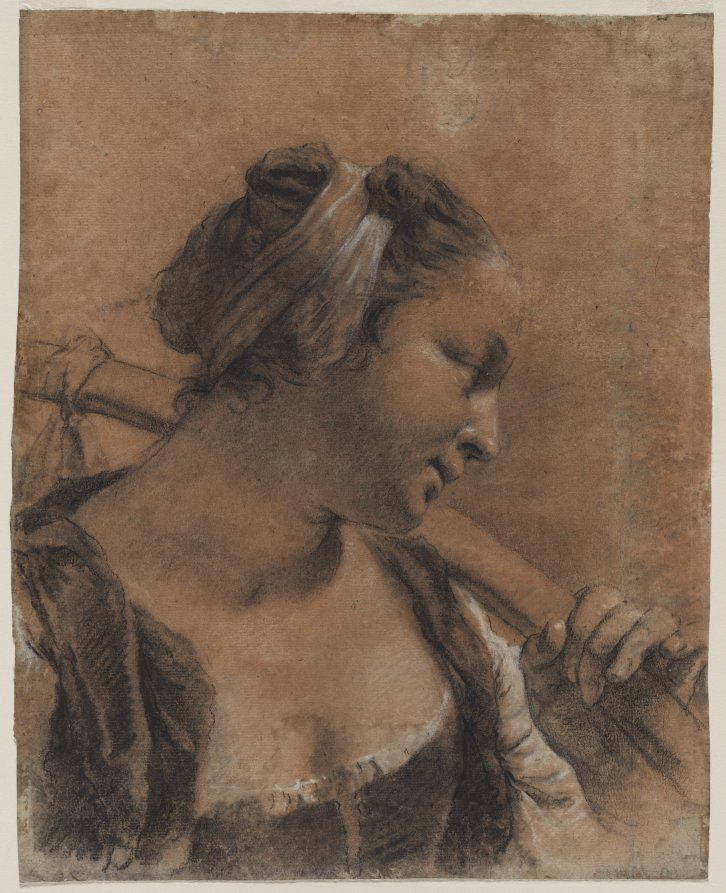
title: A Portrait of Rosa with a Shoulder Stick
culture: Italy, Venice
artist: Giovanni Battista Piazzetta (Italian, 1682–1754)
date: c. 1735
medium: black chalk heightened with white chalk, stumped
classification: Drawing